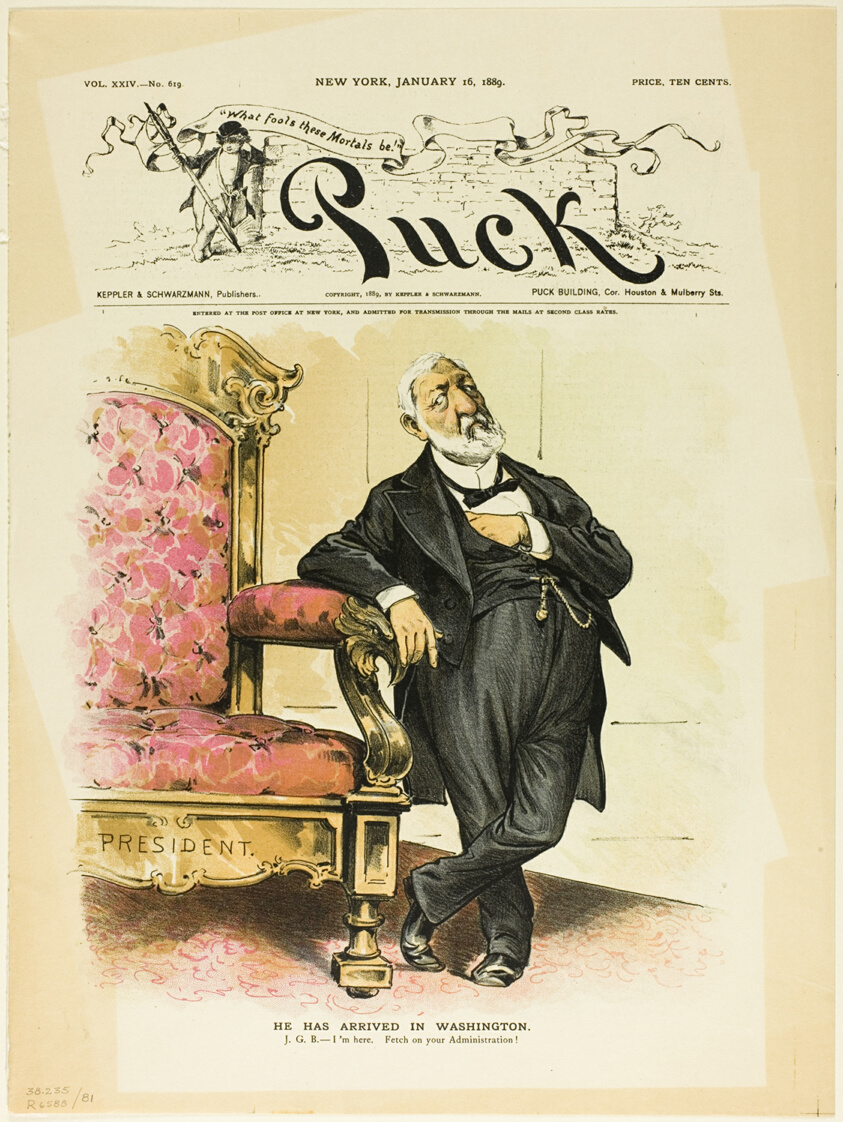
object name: Print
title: He Has Arrived in Washington, from Puck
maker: Unknown Artist; American, 19th century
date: 1889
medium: Color lithograph on newsprint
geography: United States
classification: lithograph; print; prints and drawing